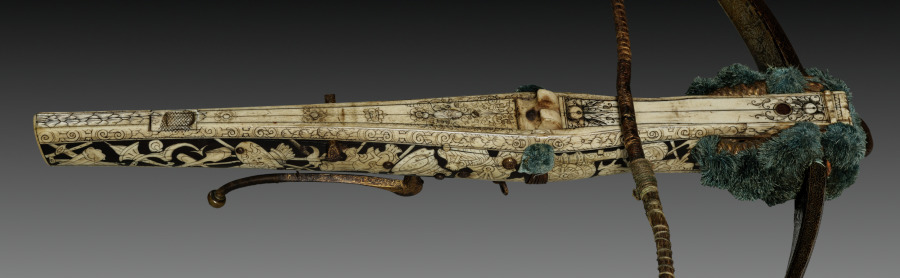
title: Crossbow of Elector Augustus I of Saxony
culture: Germany, Saxony, 16th century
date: c. 1553–73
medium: wood (walnut?), bone veneers, flax cord, steel (etched, traces of gilding). woolen pompoms, stock decorated wih inlaid trophies of arms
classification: Arms and Armor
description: This crossbow was a hunting weapon for Prince Elector Augustus I, a member of the ruling elite in the Holy Roman Empire. Augustus, powerful and wealthy, had even the most practical instruments ornately decorated, including this crossbow and its cranequin, or winding device.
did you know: Augustus was a marksman who took part in crossbow competitions. He had a large collection and often gave them to friends.